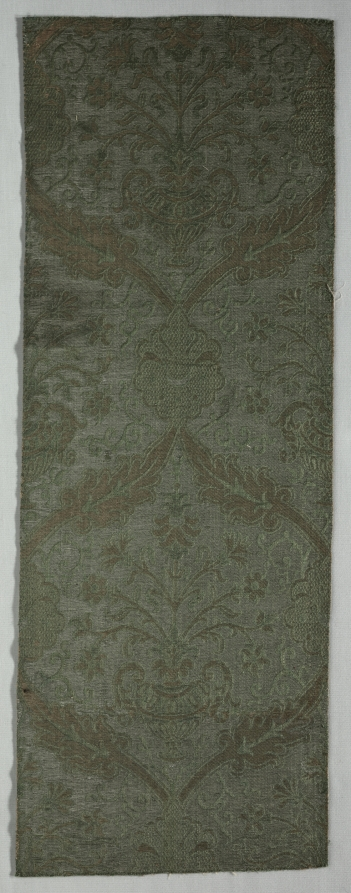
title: Brocatelle Textile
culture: Italy or Spain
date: 1500s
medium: plain compound satin; silk and silver thread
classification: Textile